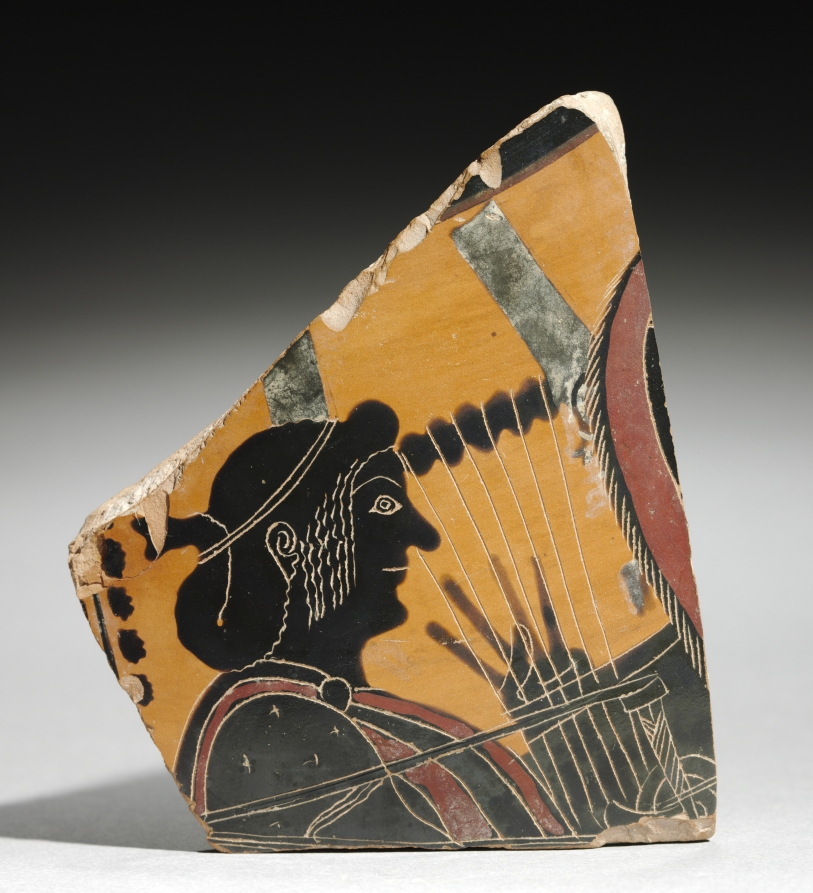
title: Fragment from Black-Figure Neck-Amphora of Panathenaic Shape (Storage Vessel): Apollo with Lyre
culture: Greek, Attic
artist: manner of Antimenes Painter (Greek, Attic, active c. 530–510 BCE)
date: c. 520 BCE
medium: ceramic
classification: Ceramic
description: With so little preserved, the precise subject once shown on this vase remains uncertain. Along with Apollo playing his lyre, parts of the mane and reins of a horse remain, suggesting a chariot procession—perhaps for the wedding of Peleus and Thetis, an event attended by the Olympian gods.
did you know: Although only two fragments survive from this vase, both show Apollo, here playing his lyre.